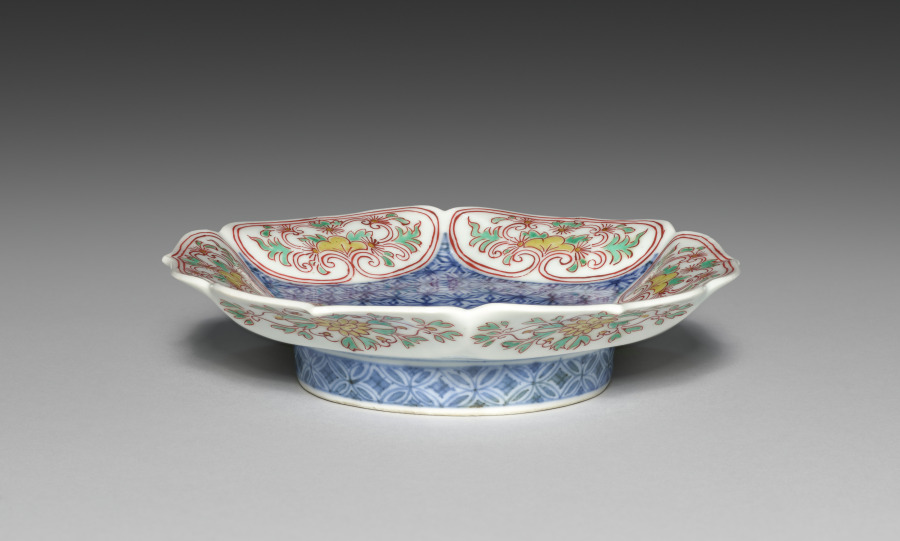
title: Small Dish (Kozara) with Hemp-Leaf Pattern and Bellflower Rim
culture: Japan, Edo period (1615–1868)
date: c. 1670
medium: Porcelain with underglaze blue and color enamel (Hizen ware, Nabeshima type)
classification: Ceramic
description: This dish combines underglaze blue decoration with overglaze color enamels. In between is a transparent glaze.